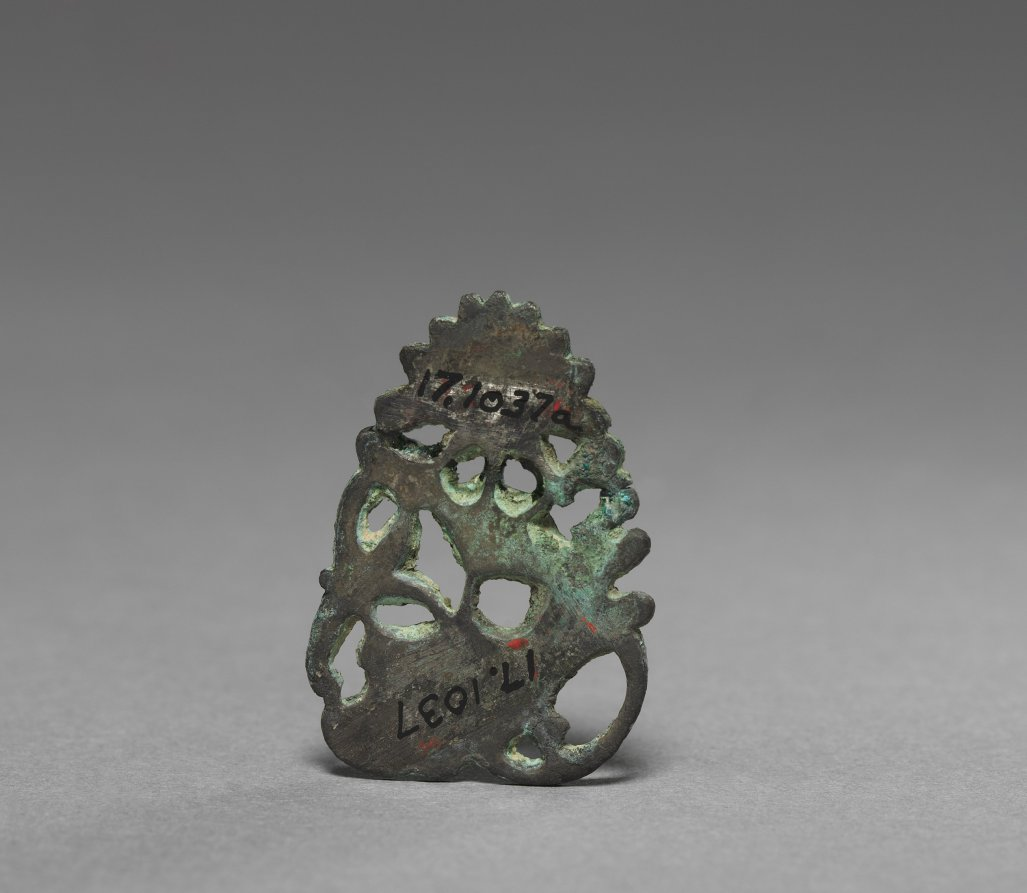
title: Ornament with Carp and Lotus Design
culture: Korea, Goryeo dynasty (918–1392)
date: 1100s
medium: bronze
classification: Metalwork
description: Metalworking techniques advanced remarkably during the Goryeo period (918–1392). Sophisticated metal objects with intricate designs were used not only as daily accessories, but also as burial goods for commemorating the dead. Traces of fibers found on the backs of these metal ornaments suggest that they were once used as brooches to hold garments together.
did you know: This metal ornament is part of a decorative brooch once used to hold clothes together.